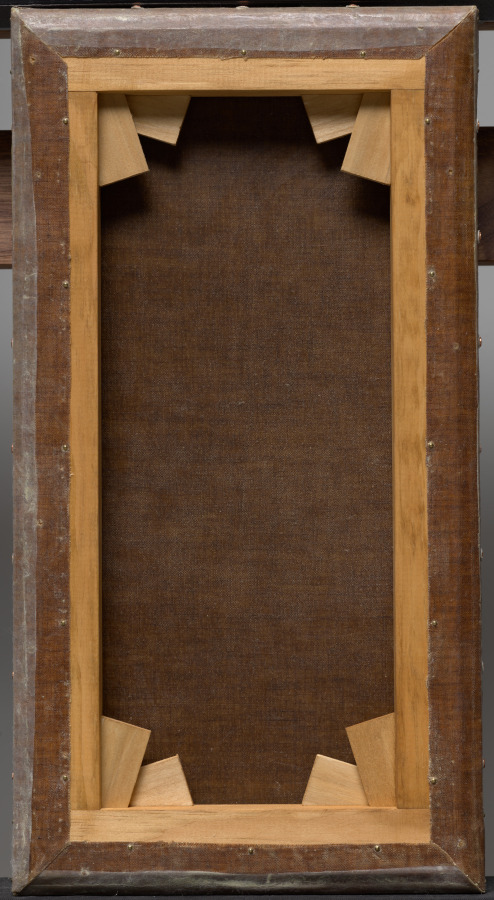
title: Woman in Profile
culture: France, 19th - 20th century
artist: Henri Jean Guillaume Martin (French, 1860–1943)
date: c. 1889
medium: oil on canvas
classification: Painting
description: Henri Martin was an important French painter from Toulouse known for his contributions to the Neo-Impressionist movement. He painted this striking depiction of a woman seated outdoors before tall trees at a moment when he was just beginning to develop his mature style. The figure and background are painted with short, thickly applied strokes of pure color, filling the composition with energy and life. The trees are rendered with small hatching strokes and form a background of nearly abstract, decorative shapes.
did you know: A highly celebrated artist during his lifetime, Henri Martin received commissions to produce large paintings to decorate the interiors of important buildings in Paris, including the Palais Royal, the Hôtel de Ville (city hall), the Sorbonne, the Palais de Justice, and Élysees Palace.